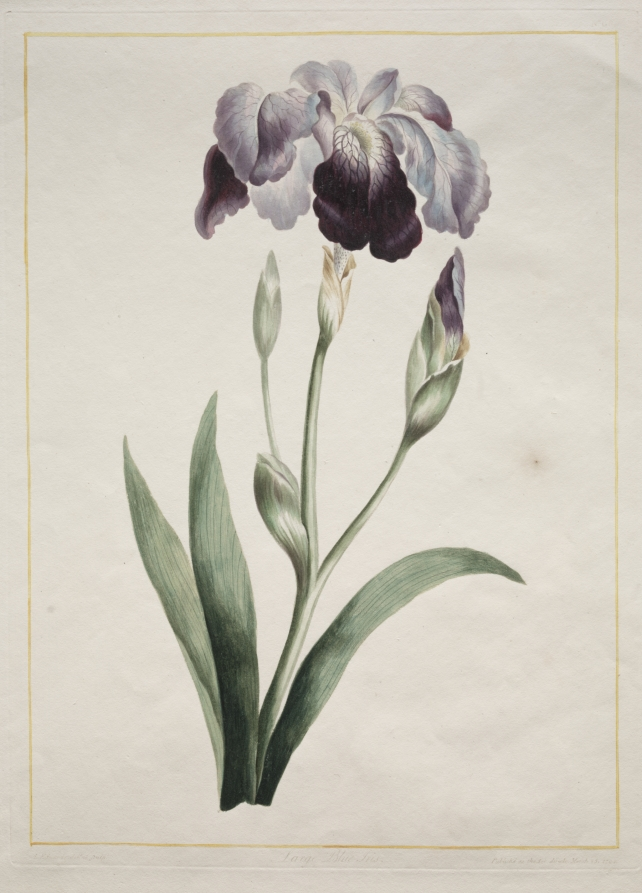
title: Japanese Iris (Large Blue Iris)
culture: England, late 18th-early 19th Century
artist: John Edwards (British)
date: 1801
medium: etching, hand colored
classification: Print